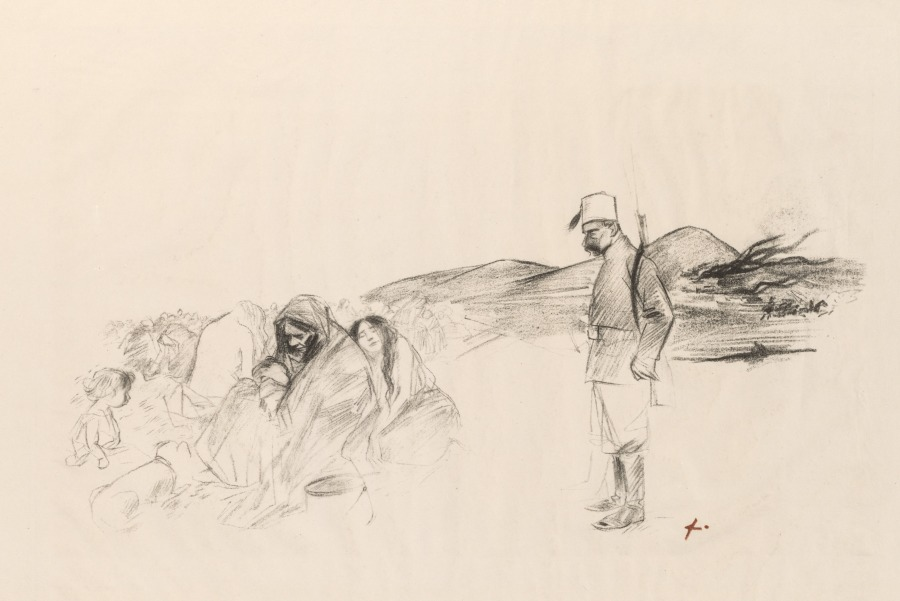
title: In Greece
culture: France, 19th-20th century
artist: Jean Louis Forain (French, 1852–1931)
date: 1897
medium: lithograph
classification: Print